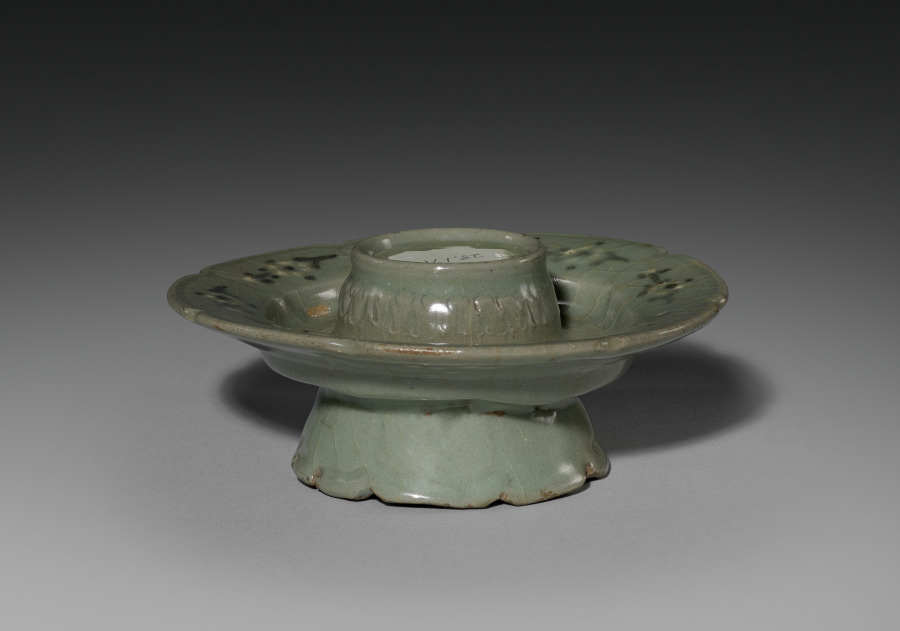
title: Saucer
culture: Korea, Goryeo dynasty (918–1392)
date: 1100s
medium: Celadon ware with inlaid white and black slip decoration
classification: Ceramic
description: This celadon wine cup is inlaid with a chrysanthemum pattern that reflects Koreans’ enjoyment of both the poem "Drinking Wine" and the blessings of longevity associated with the Double Nine Festival. The flower design on the saucer is less delicate than the cup, as the cup and saucer were originally from different sets; they were later paired together after each lost its mate.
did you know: Elites of the Goryeo period are known for their love of drinking tea and wine. This type of delicate-looking cup stand not only made their drinking experience more enjoyable, but also showed their refined taste.